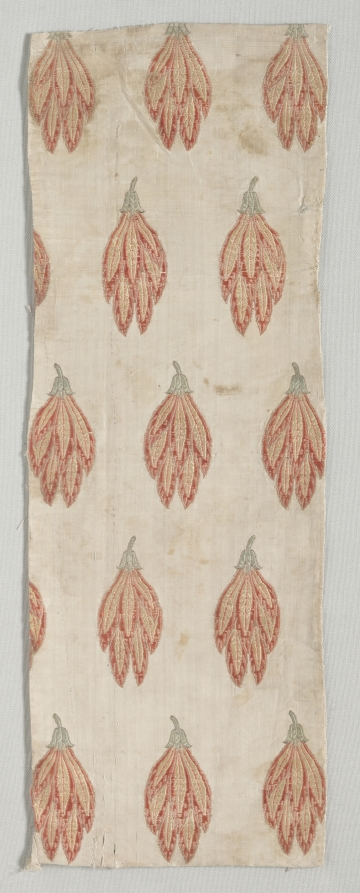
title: Fragment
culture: Iran, 18th century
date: 1700s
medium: brocade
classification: Textile